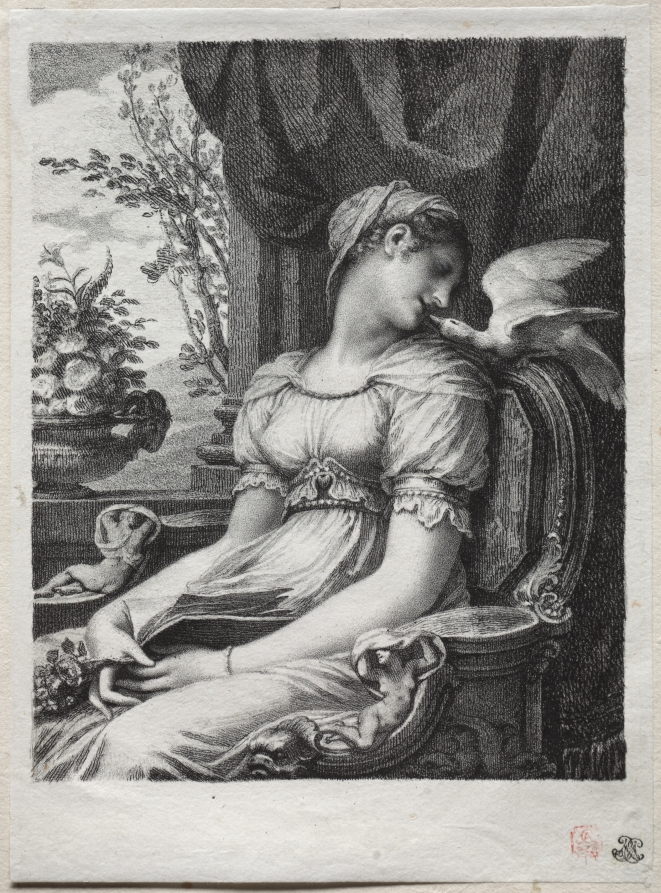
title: Meditation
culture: France, 19th century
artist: Pierre-Paul Prud'hon (French, 1758–1823)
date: 1822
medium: lithograph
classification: Print